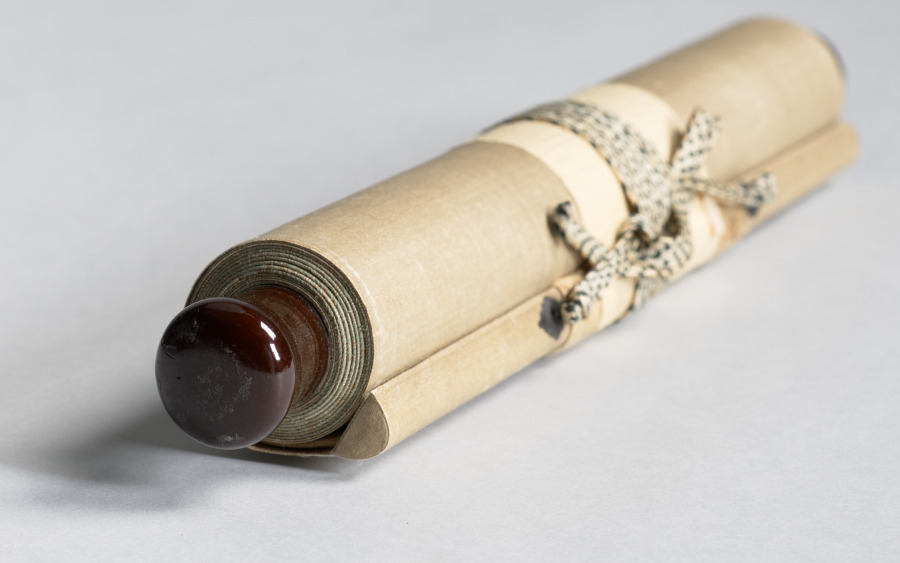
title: Bodhidharma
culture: Japan, Muromachi period (1392–1573)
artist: Unkei Eii (Japanese, active 1504–1520)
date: early 1500s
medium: hanging scroll; ink on paper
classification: Painting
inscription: signed: "Unkei" two-line inscription signed: Shunpō Sōki (1416-1496), 40th abbot of Daitokuji temple